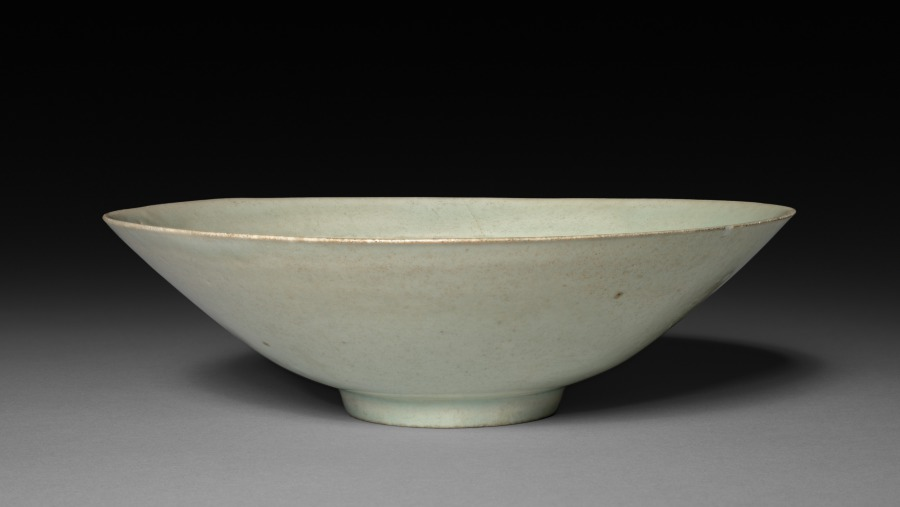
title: Bowl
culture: China, Southern Song dynasty (1127-1279)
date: 1100s–1200s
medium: Glazed porcelain, qingbai ("blue-white") ware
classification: Ceramic